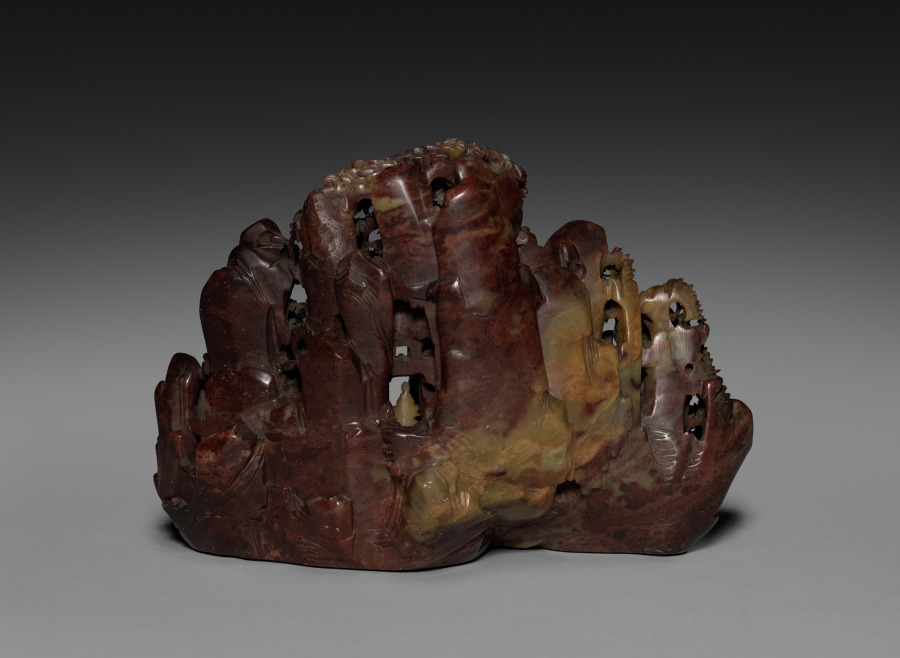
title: Landscape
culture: China, Qing dynasty (1644-1911)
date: 1644–1911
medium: soapstone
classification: Stone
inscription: 石門洞天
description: A mountain scenery surrounded by water and fish is meticulously carved out of soapstone, with a pond, bridge, waterfall, and temple front in its center. The unidentified figure scene on the left includes an ox and a man wearing what appears to be a Korean hat. A Buddha figure hidden in the depth of the temple can be glimpsed from the backside. The inscribed pillar on the right reads “Stonegate Cave to Heaven (shimen dongtian)”. Indentations all over the stone suggest that the miniature mountain was once adorned with precious stones and metal, presumably representing an earthly paradise to which one could escape in one’s mind and imagination.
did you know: A waterfall plummets down the cliff by the temple and then flows smoothly down to join the river at the front of the landscape scene.